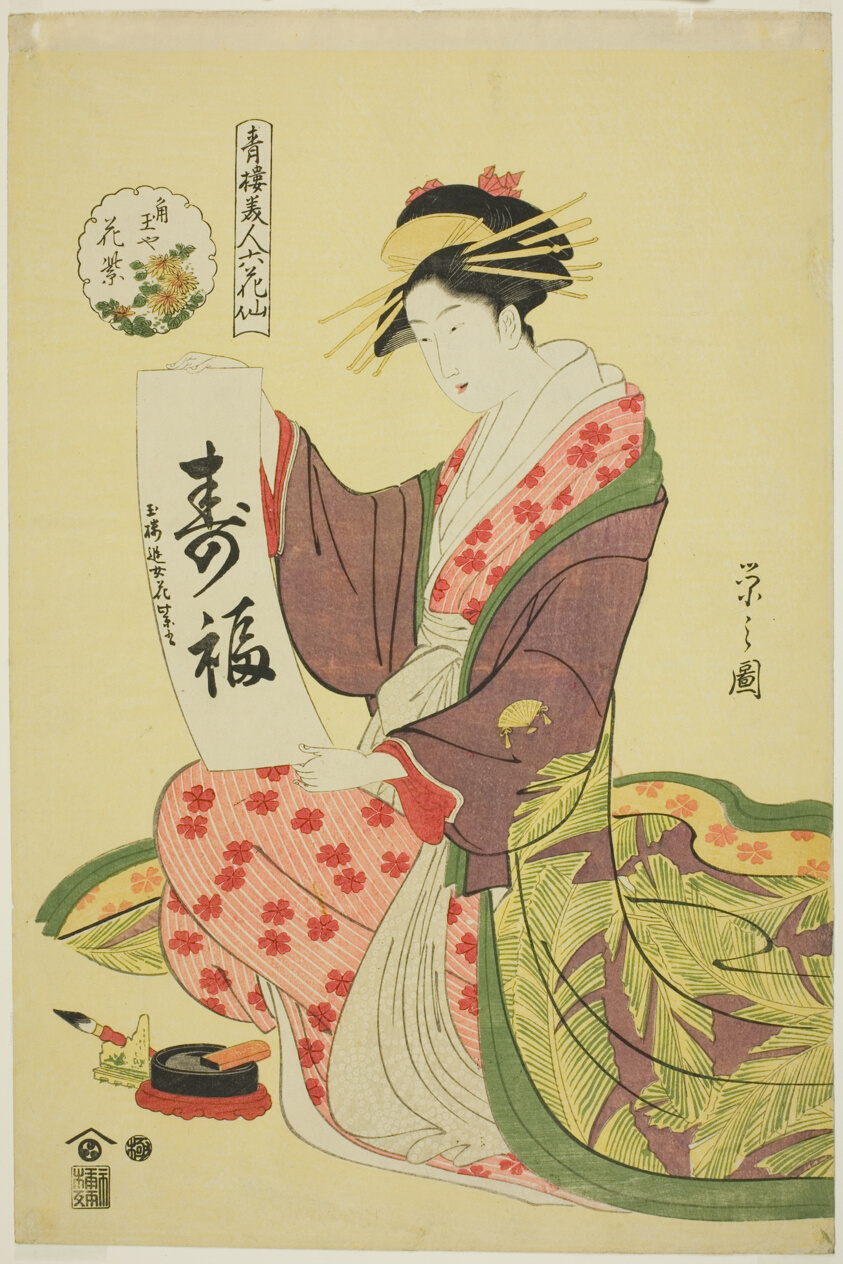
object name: Print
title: Hanamurasaki of the Kadotamaya, from the series Six Flowery Immortals of the Pleasure Quarters (Seiro bijin rokkasen)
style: Japanese (culture or style)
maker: Chobunsai Eishi; Japanese, 1756-1829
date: c. 1794/95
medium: Color woodblock print; oban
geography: Japan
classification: woodblock print; print; asian art